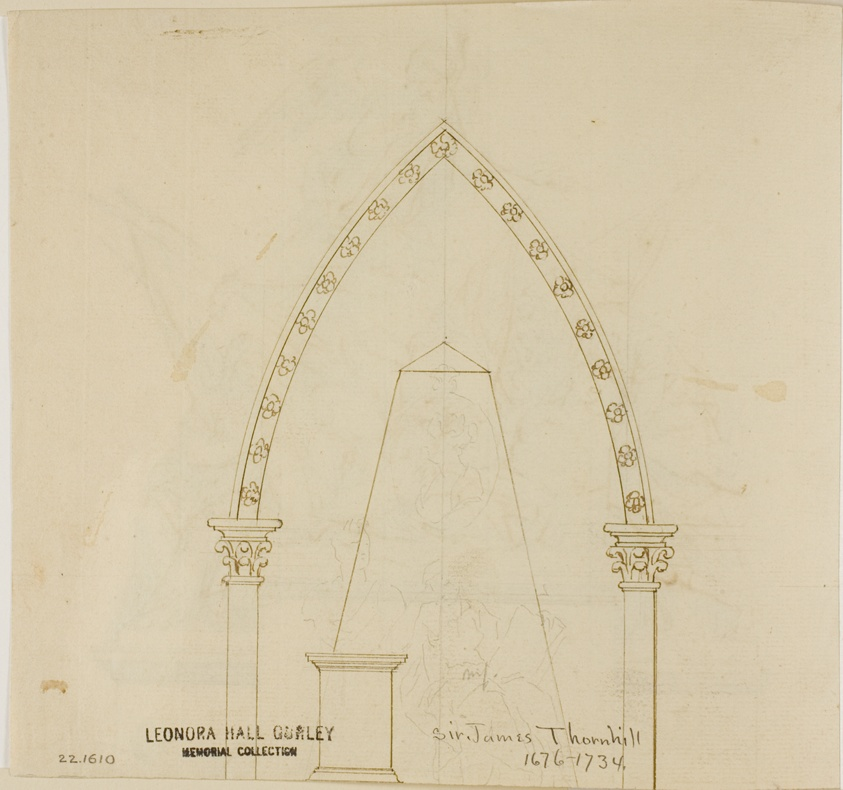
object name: Drawing and Watercolor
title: Warrior Accompanied by Britannia, Minerva, and Fame (recto); Design for the Monument to Nicholas Rowe (verso)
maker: John Michael Rysbrack (Flemish, 1693-1770); or Richard Wilson (English, 1714-1782)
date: c. 1733 (recto); c. 1740 (verso)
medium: Pen and brown ink, with brush and brown wash, over red chalk and graphite (recto); pen and brown ink over graphite (verso), on cream laid paper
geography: Flanders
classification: pen and ink drawings; drawings (visual works); prints and drawing